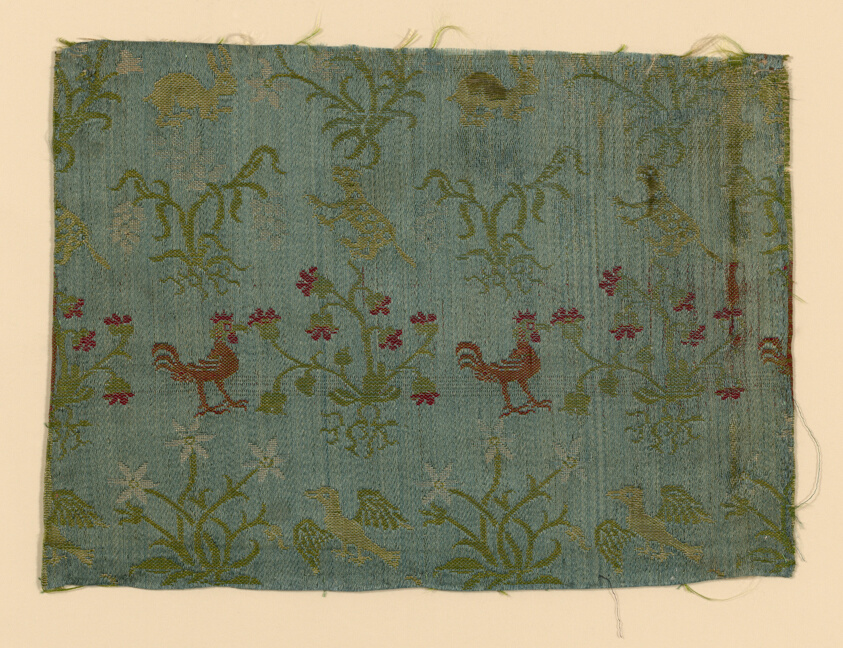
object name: Textile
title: Fragment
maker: Italy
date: 1650/1700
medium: Silk, warp-float faced satin weave with self-patterning ground wefts tied by supplementary binding warps in plain interlacing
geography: Italy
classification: textile; weaving